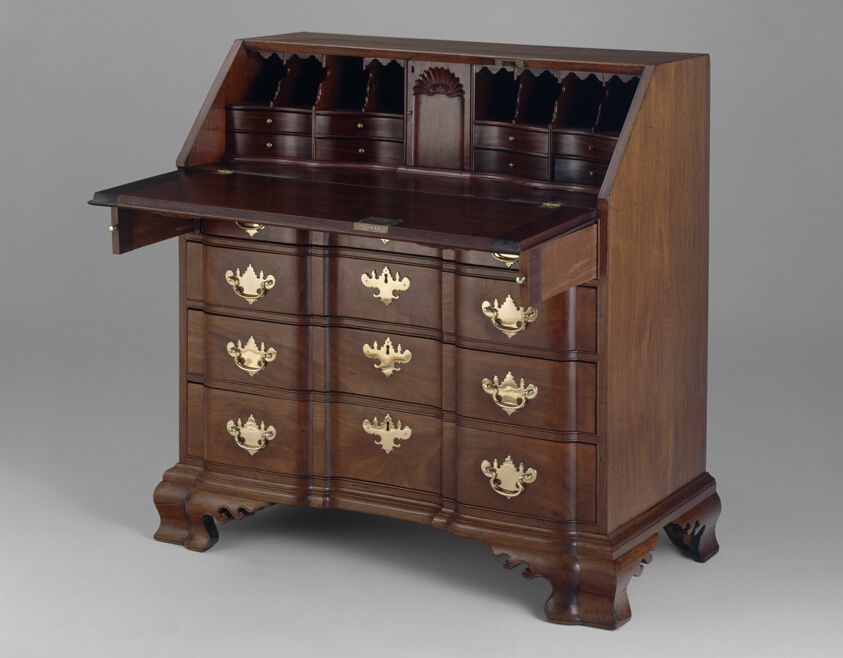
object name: Furniture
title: Desk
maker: Attributed to Felix Huntington; American, 1749–1823; Norwich, Connecticut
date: 1775–90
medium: Mahogany, zebrawood, and white pine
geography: Norwich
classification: desk; furniture; american decorative arts; american arts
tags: furniture